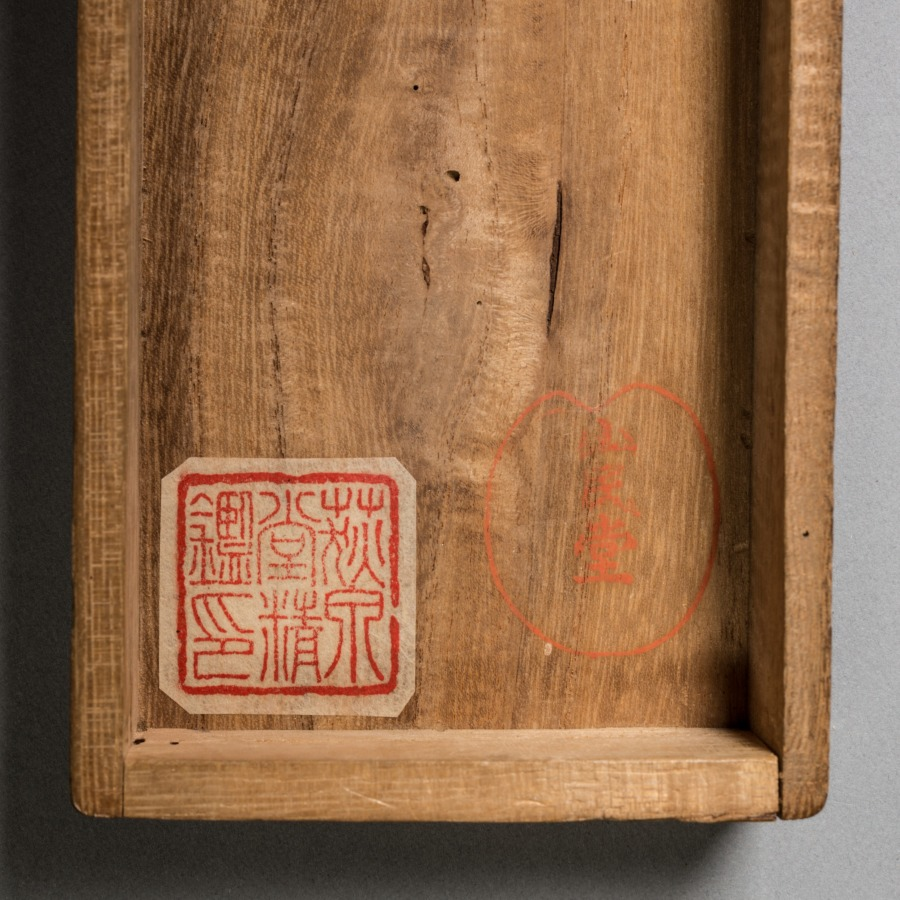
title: Landscape with Gentle Peaks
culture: Japan, Edo period (1615–1868)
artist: Kan Tenju (Japanese, 1727–1795)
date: 1767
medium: hanging scroll; ink and light color on paper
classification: Painting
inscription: 雨過嵐光煙／雲陽樹影諫／夕陽独在左／？卷讀残書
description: A figure sits in a retreat tucked into the mountains near a waterfall. The painter, Kan Tenju, was best known as a calligrapher and seal carver. Of Korean heritage, he was a patron of artist Ike Taiga (池大雅) (1723–1776), and a cousin of Taiga’s student Aoki Shukuya (青木 夙夜) (died 1802). His Chinese-style poem reads as follows: Smoky mist in the mountain reflects light after the rain, Sunlight passes through the clouds to cast shadows of the trees, Alone in the sunset, I read a well-worn book.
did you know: This painting combines image and calligraphy, connected by skillful brushwork.